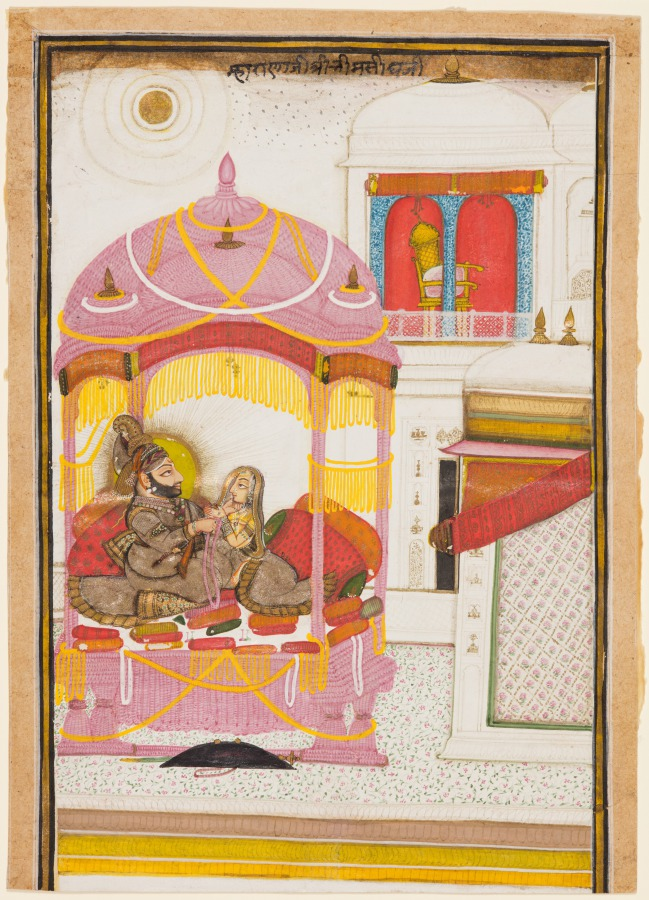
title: Maharana Bhim Singh of Mewar (r. 1778–1828) with a Consort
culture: Northwestern India, Rajasthan, Rajput Kingdom of Mewar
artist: attributed to Chokha (Indian, active c. 1799–1824)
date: c. 1810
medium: Gum tempera, silver and gold on paper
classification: Painting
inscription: mhārānā jī śrī bhīma sīṃgha jī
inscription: sakhī rānā bhīma siṃgha rī kachajhu mei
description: The consort folds her hands in devotion to the Maharana whose glory is highlighted with a halo behind his head. The Maharana fondly holds the chin of his paramour and appears to be in the process of putting a garland around her neck. One of the most celebrated artists in the history of painting at Mewar, Chokha has nestled the couple in an overabundance of bolsters, their chamber covered with pink flower petals and draped with yellow garlands.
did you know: A European-style armchair in the background is a reminder of British influence at the court.